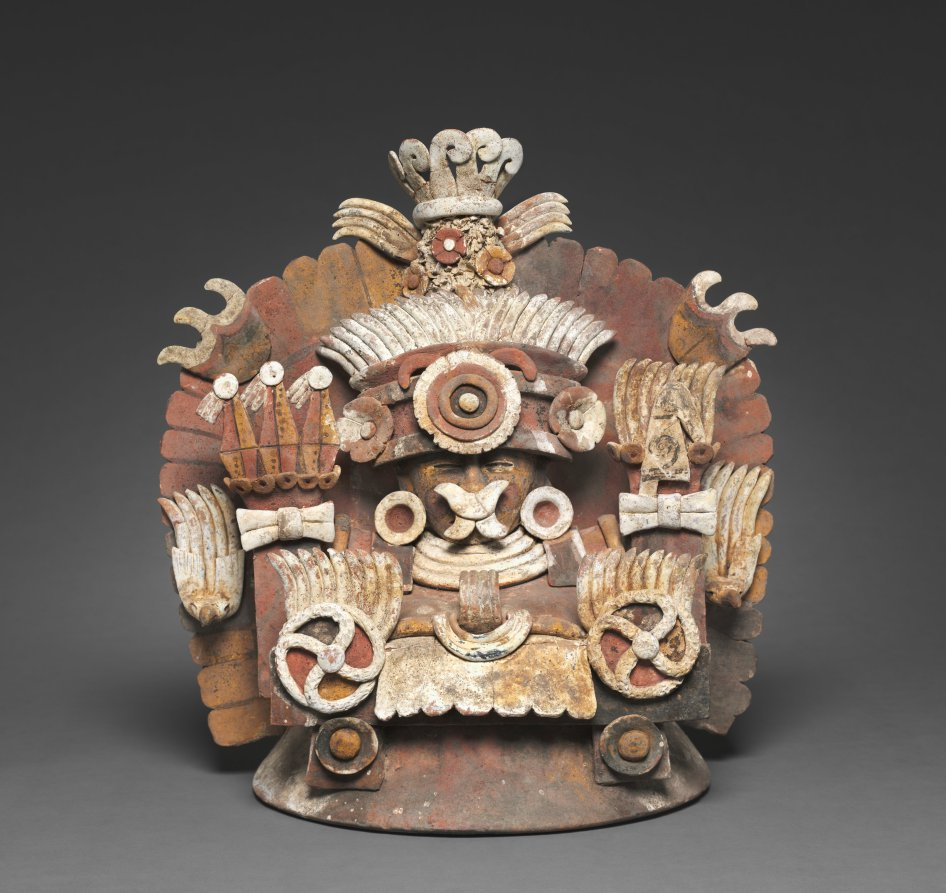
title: Incense-burner Cover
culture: Guatemala, Escuintla Region, early 6th Century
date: c. 500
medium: earthenware with slip and pigments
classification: Ceramic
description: This elaborate clay construction served as the cover and chimney of a basin used to burn copal incense. Although probably manufactured in what is now Guatemala, the form and fabrication are based on examples from Teotihuacan in central Mexico, hundreds of miles away. Intensive trade between the two regions, or even a Teotihuacan colony in Guatemala seems likely. The masked, dressed, and ornamented moundlike form probably represents a mortuary bundle or a cult image.